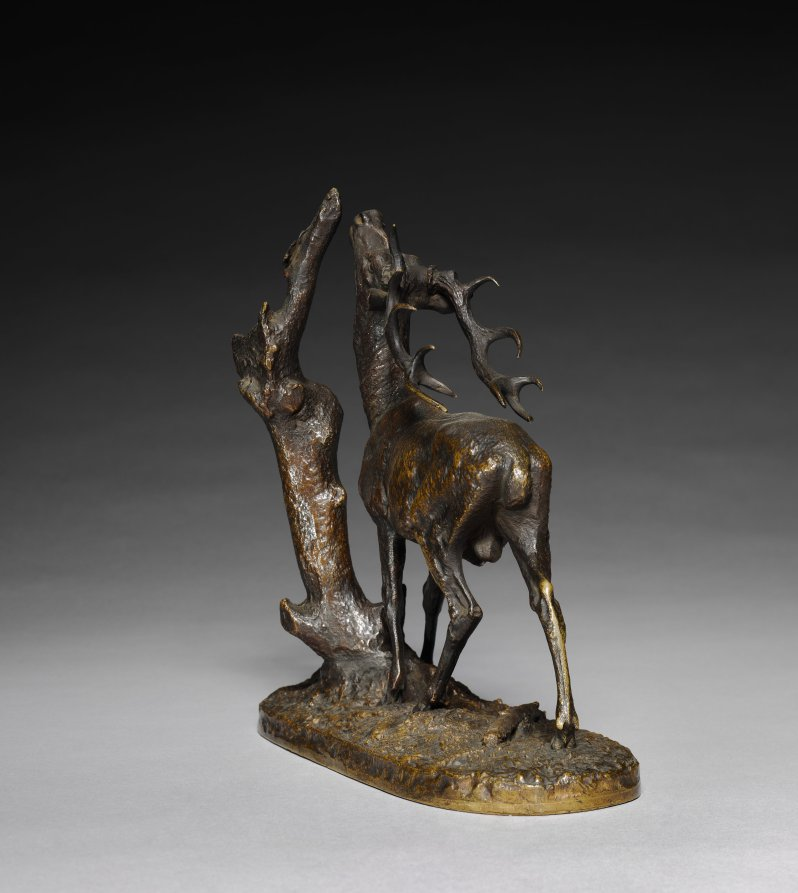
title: Stag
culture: France, 19th century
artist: Pierre Jules Mène (French, 1810–1879)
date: c. 1825 – 1879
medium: bronze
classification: Sculpture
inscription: Signed: "P. J. Mene"